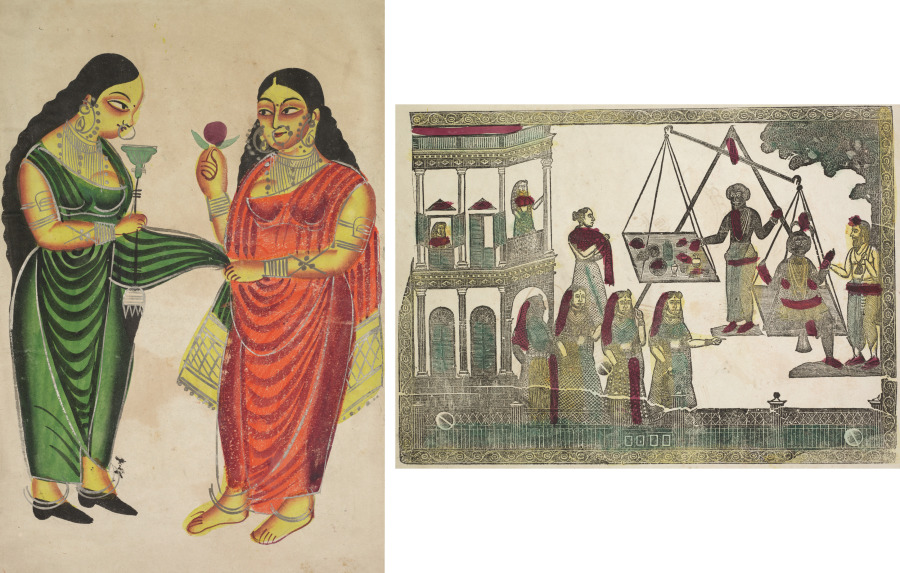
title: Leaf from a Kalighat album: Maid bringing a hookah to a lady (recto); Krishna weighed against precious objects(?) (verso)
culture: Eastern India, Bengal, Kolkata, Kalighat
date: c. 1890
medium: Gum tempera, graphite, ink, and tin on paper; Woodcut, hand colored with gum tempera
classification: Painting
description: Kalighat paintings reflect the time and context in which they were created. Kalighat painters used their medium to offer penetrating and insightful critiques of British-influenced Indians as well as the British themselves through satires and caricatures. Newly rich Bengali native Indian clerks (babus) aspired to dress and behave like their British masters, and Kalighat painters taunted them for this. The maid, dressed in green, holds a hookah in her right hand. The lady in red is likely a fashionable high society concubine or prostitute known and depicted at this time as hookah-smoking, makeup-wearing, paan- (betel leaf with areca nut and lime paste) chewing hussies. The wealth created by the East India Company made it possible for Bengali babu dandies to have concubines and pay for prostitutes.